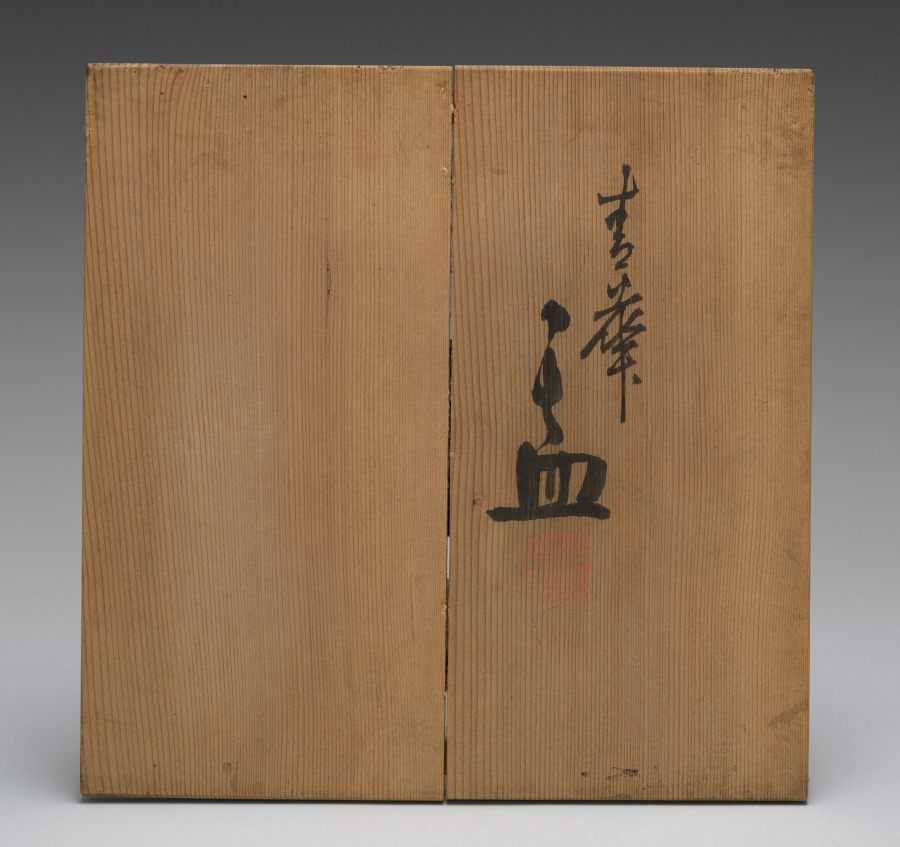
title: Nesting Bowls with Daoist Immortals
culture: Japan, Meiji period (1868–1912)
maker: Seifū Yohei III (Japanese, 1851–1914)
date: 1893–1914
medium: Set of three bowls; porcelain with underglaze blue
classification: Ceramic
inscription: 清風与平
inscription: 大日本清風造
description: Yohei III was capable of ink painting–like compositions in underglaze blue, as well as more decorative ones like that on this set of three nesting bowls. Bowls with very similar designs in five colors were produced in the reign of the Wanli emperor (r. 1572–1620) during the Ming dynasty, and Yohei must have had direct access to one of these or to a close copy. A scene of Daoist immortals is presented on the bowls. On each one, the ground plane is defined with a blue wash. Four lanterns are evenly spaced around the bowl. Two are flanked with linked-piece metalwork banners of the seven treasures. The alternate altars are adorned with textile banners. In between them are four immortals, each standing beneath a tree with small plants surrounding his feet. Two of the immortals hold fruit on a tray. Another carries an elixir-filled ewer and a willow branch. The fourth holds a swastika (manji), here an auspicious symbol, and a flower. Curiously, the inscription inside each footring reads “Made by Seifu of Great Japan,” in emulation of the dynasty and reign inscriptions that appear on Chinese ceramics; however, one can also see through the translucent glaze another inscription, “Seifu Yohei,” written in large characters within a double band of blue on the largest bowl.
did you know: In the bottom of each bowl is a scene of two robed immortals who appear to stand on a precipice in a mountainous landscape high in the clouds, with celestial orbs over their heads.